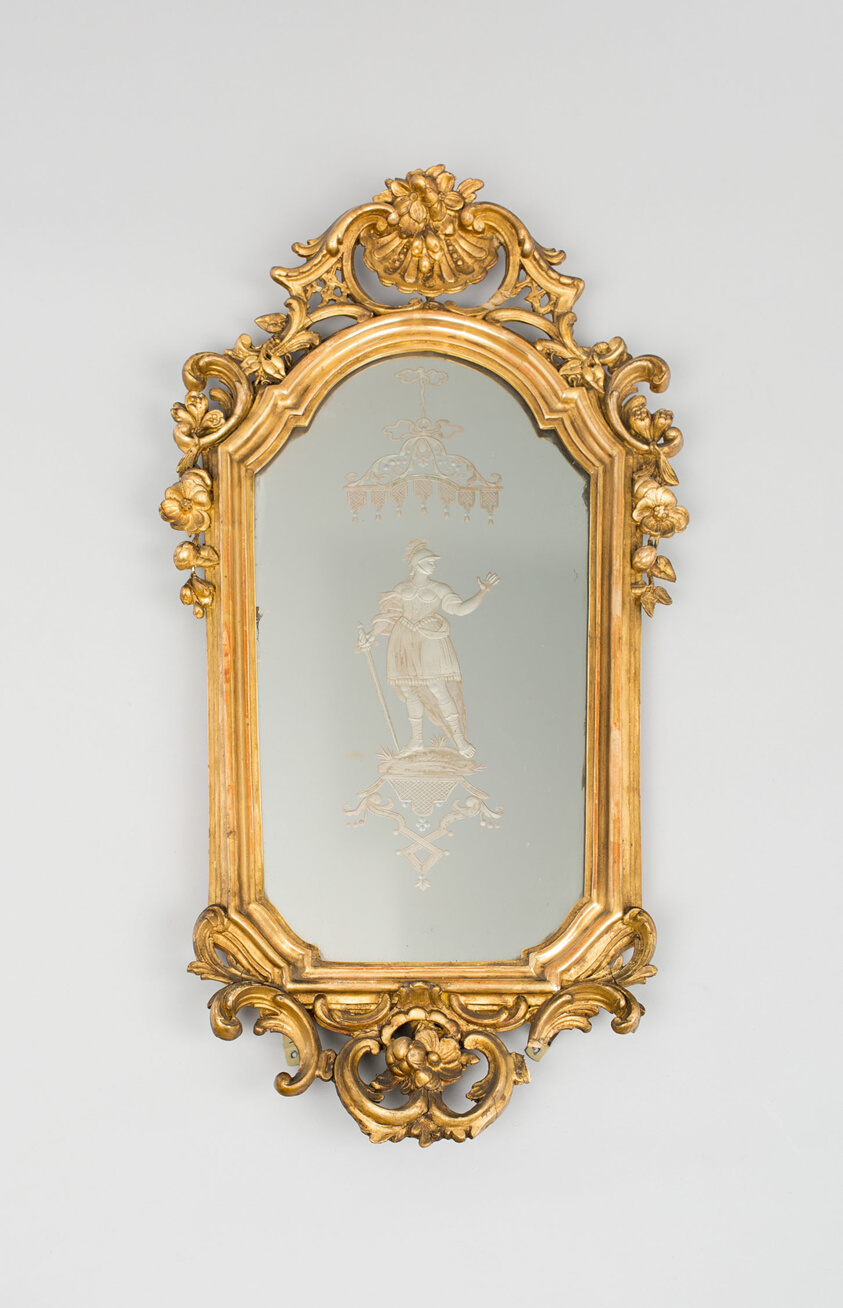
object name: Furniture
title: Mirror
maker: Venice, Italy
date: Mid 18th century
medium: Gilded wood, engraved mirror glass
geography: Venice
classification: mirror; furniture; european decorative arts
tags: furniture